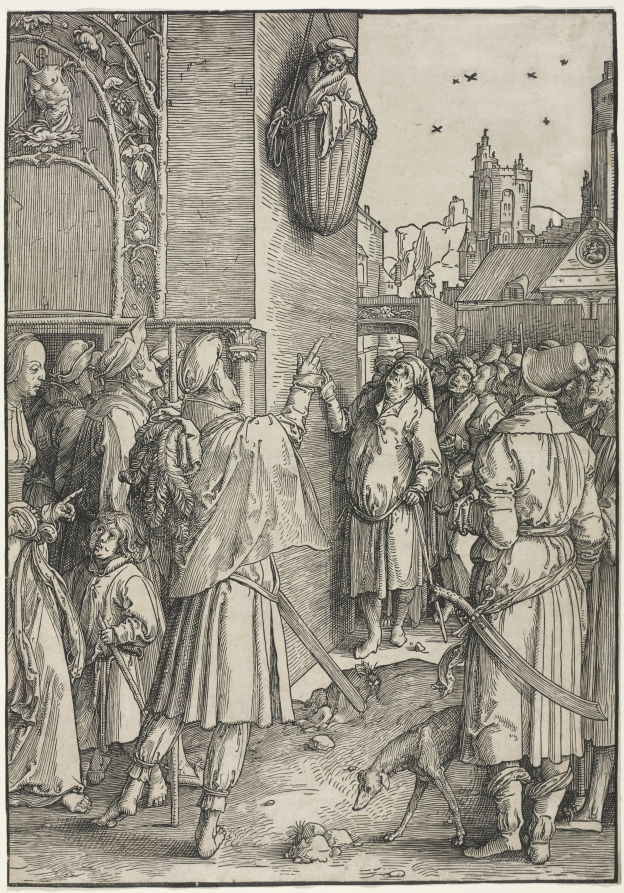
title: The Power of Women: The Poet Virgil Suspended in a Basket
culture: Netherlands, 16th century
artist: Lucas van Leyden (Netherlandish, 1494–about 1533)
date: c. 1512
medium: woodcut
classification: Print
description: This woodcut is from a series depicting the power of women, a popular early 16th-century theme. The series highlights a woman’s capacity to use beauty, charm, and ruse to thwart even the cleverest men. Here, Van Leyden illustrated the cunning of the Roman emperor’s daughter. According to legend, the poet Virgil fell in love with the maiden, but she objected and punished him for his impudence. After promising to raise Virgil to her bedroom window in a basket, she left him hanging halfway. The printmaker omitted the emperor’s daughter from the scene but added the woman advising her son against such folly.